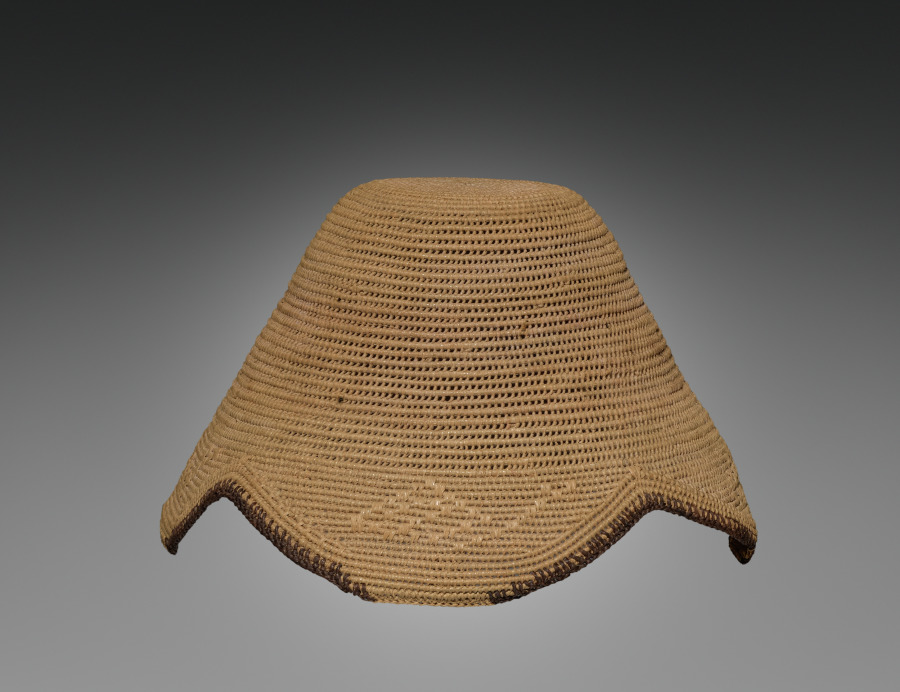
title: Hat (laket)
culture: Africa, Central Africa, Democratic Republic of the Congo, Kuba-style maker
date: early 1900s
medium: Raffia and dye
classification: Garment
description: Titled Kuba men and prominent women wear the laket, a small ornate dome-shaped hat. An essential fashion item of adult men in good social standing, it focuses special attention on the head as a significant marker of individual identity, ethnic affiliation, status, and role in society. This prestige object is secured on the crown of the head with a nine-and-a-half-inch metal pin that pierces through the hat onto a clump of hair. This laket is made from raffia palm fiber coiled into threads and woven in different patterns. There are two examples of the laket: the plain type with the flat top, and the more elaborate type called the laket mishiing.